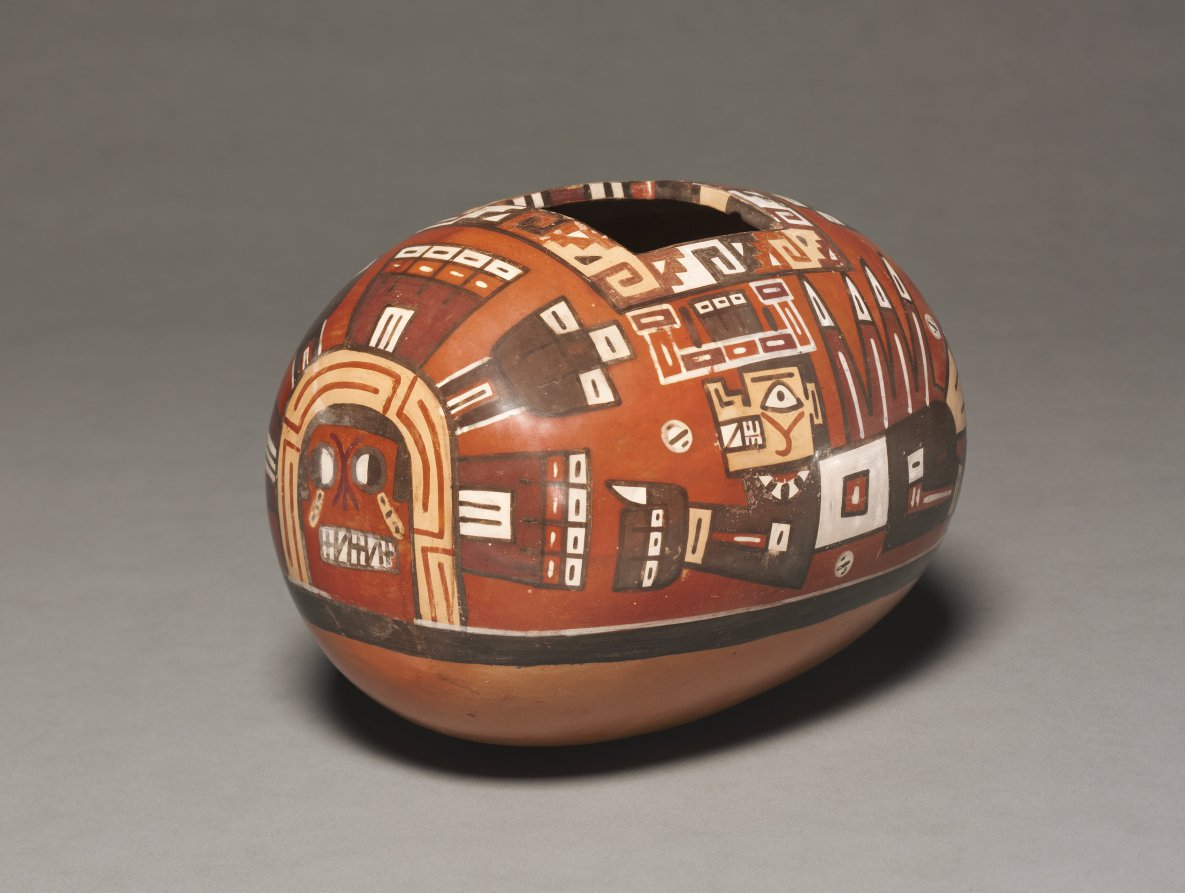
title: Container with Deity Head and Winged Attendants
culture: Central Andes, central coast, coastal Wari style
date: 600–1000 (Thermoluminescence date, 730–1190)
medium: ceramic and slip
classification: Ceramic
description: The head of the staff deity, the most important supernatural being depicted in Wari art, appears on the ends of this container, the function of which is mysterious. The sides feature two of the deity's attendants, each with a wing and N-shaped fangs drawn from the animal world. One of these creatures carries a staff, a supreme symbol of divine authority and power.